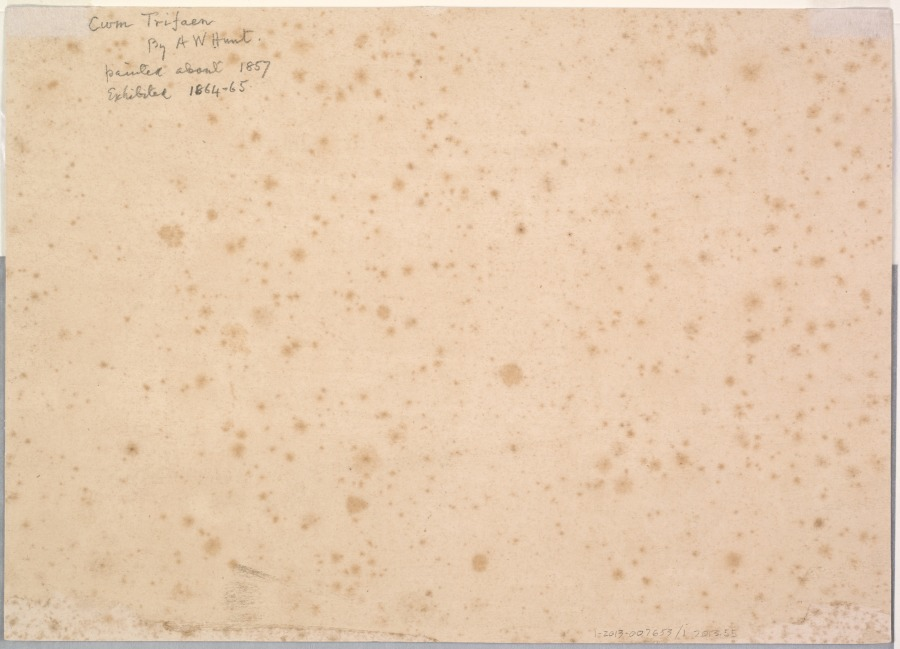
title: Cwm Trifaen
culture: England, 19th century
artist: Alfred William Hunt (British, 1830–1896)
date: c. 1857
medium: watercolor with gouache and scratching out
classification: Drawing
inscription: Inscribed on the back of the support in graphite: Cwm Trifaen/By AW Hunt/painted about 1857/exhibited 1864-65.